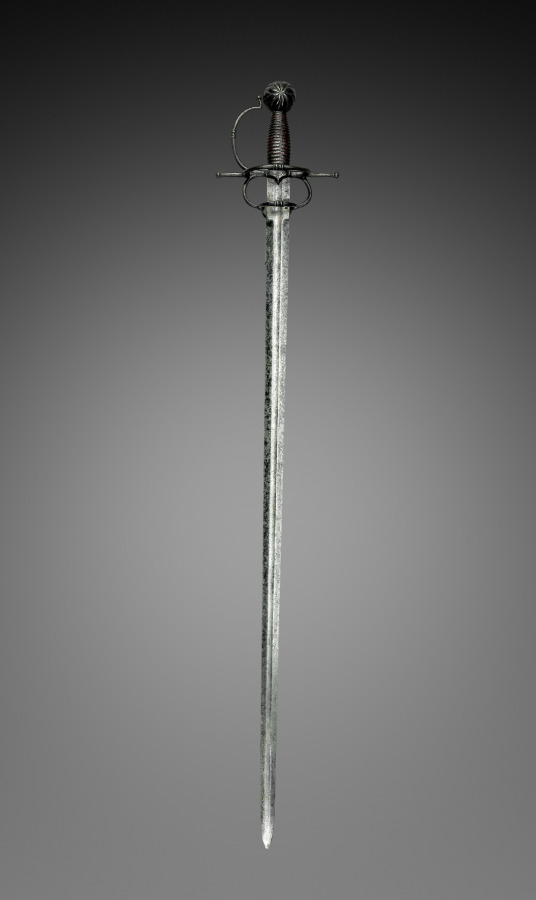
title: Sword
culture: Italy, 16th century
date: c.1550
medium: steel, hilt russetted, leather grip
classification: Arms and Armor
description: The hilt of this sword is russeted, a decorative technique popular in France and England that imparts a brownish color to the surface of the metal. It was achieved by a chemical process that involved treating the steel surface with a mild corrosive medium. As an added benefit the process also helps protect against rust.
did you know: There are three unidentified marks inlaid on the ricasso or the unsharpened blade just above the guard.